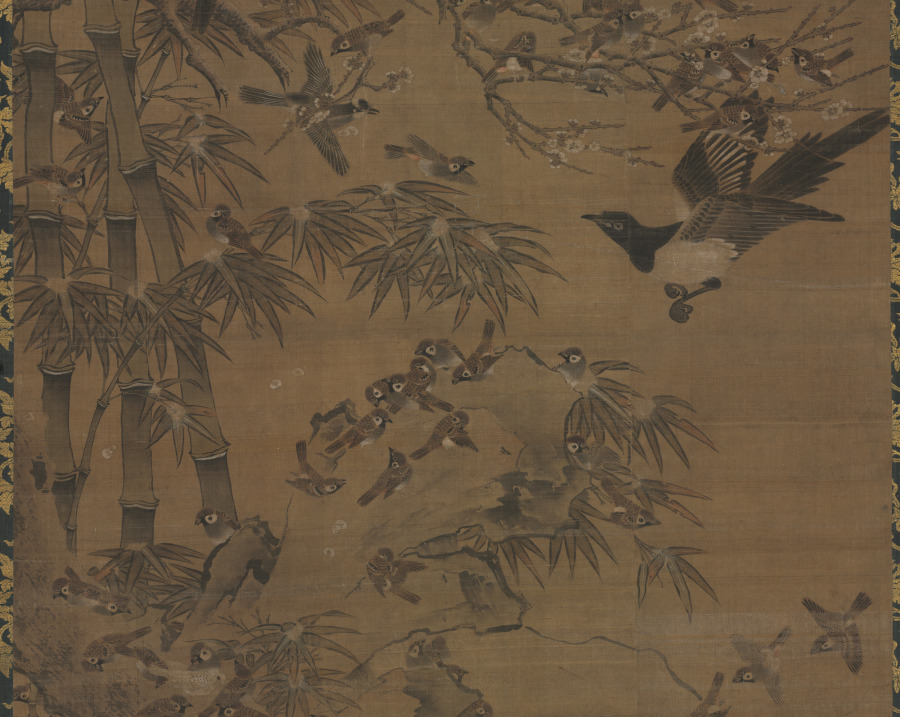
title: A Hundred Birds and the Three Friends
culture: China, Ming dynasty (1368–1644)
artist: Bian Wenjin (Chinese, about 1354–1428)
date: 1400–1425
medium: hanging scroll; ink and color on silk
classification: Painting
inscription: Artist's three seals: Pien yin Ching-chao; Sha-yang shih-chia; Ch'in shu ch'ing-lo.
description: In this hanging scroll birds rest and frolic among pines, bamboo, and flowering plum, plants known as “the three friends.” Due to their endurance in winter, they symbolize perseverance and friendship in adverse times. The naturalistic depiction of the birds refers to the bird-and-flower painting tradition of the Art Academy of the Song dynasty. The painter Bian Wenjin served at the court of the Ming dynasty Yongle Emperor (reigned 1402–24). This painting may have been hung in a private studio or palace hall on appropriate occasions.